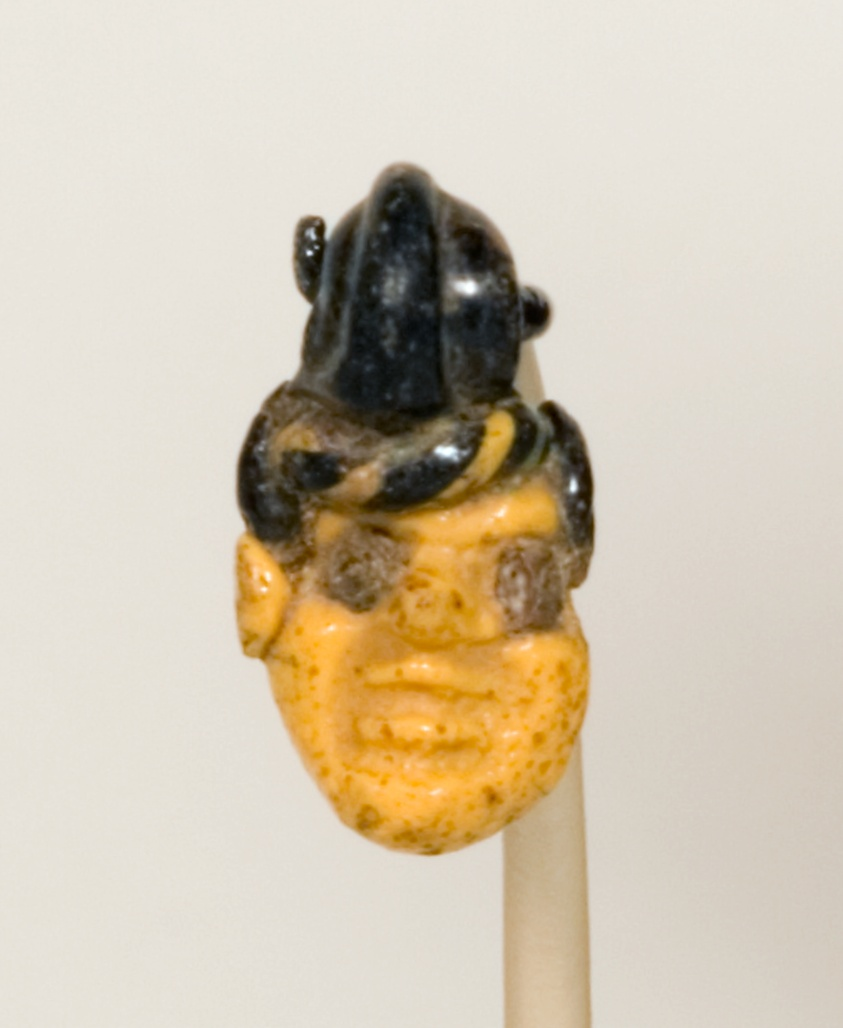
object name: Costume and Accessories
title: Pendant in the Shape of a Head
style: phoenician, egyptian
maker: Phoenician; probably from the Eastern Mediterranean, or possibly Carthage (near modern Tunis, Tunisia)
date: 5th century-3rd century BCE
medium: Glass, rod-formed technique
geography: Carthage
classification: pendant (jewelry); glass; jewelry; amulet; ancient art; costume